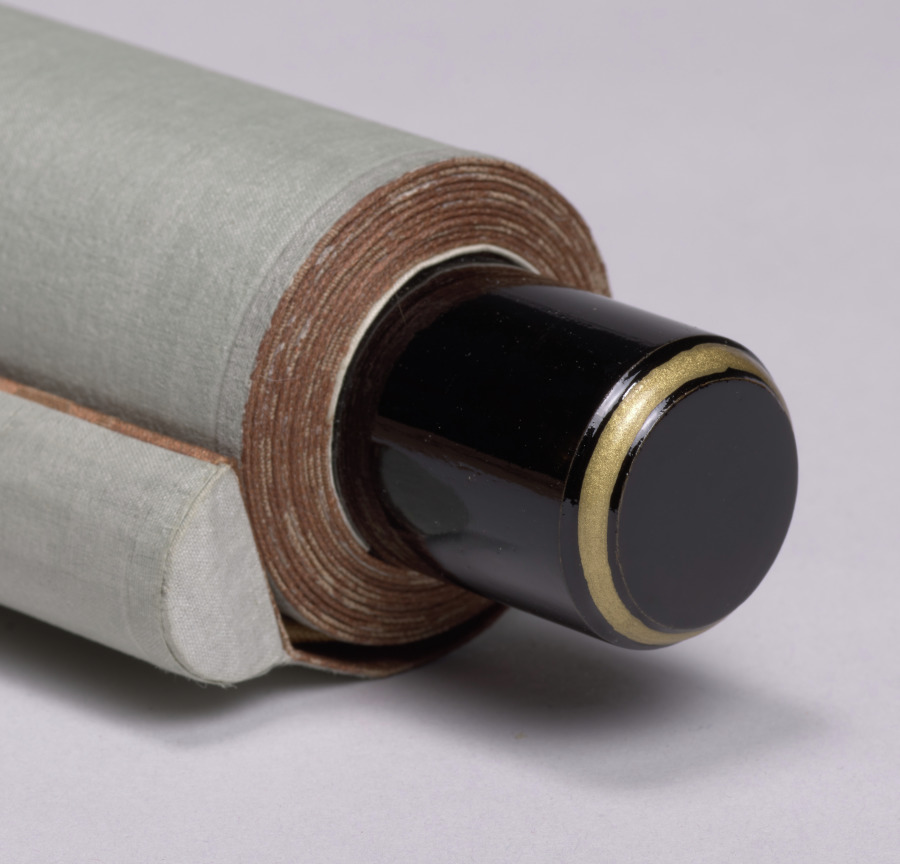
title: One Hundred Images of Fudo (Acala)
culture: Japan, Kamakura period (1185–1333)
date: 1200s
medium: Woodblock print mounted as a hanging scroll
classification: Print